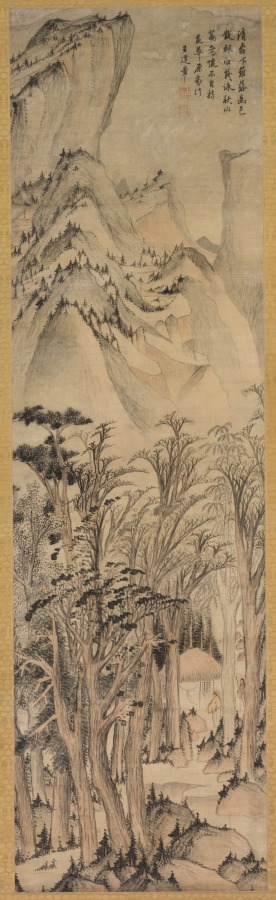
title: Solitary Colors of the Autumn Woods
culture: China, Ming dynasty (1368–1644)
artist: Wang Jianzhang (Chinese, active 1621–1662)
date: first half 1600s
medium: hanging scroll; ink and color on satin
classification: Painting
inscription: Artist's inscription, signature, and 2 seals: Cold frost falls on the fences,/ Solitary colors scatter the maples./ Reciting the chapter of "The Autumn Water,"/ I cannot still the emotion in my old heart. After the style of Fan Hua-yüan [Fan Kuan], Wang Chien-chang . [seals] Wang shih chih yin; Chien-chang. trans. LYSL/HK/WKH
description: Two gentlemen stand outside a thatched hut in a dense forest; some trees have bare branches indicating that the season is early autumn. Wang Jianzhang’s inscribed poem refers to a chapter called “Autumn Water” from Zhuangzi, a famous Daoist text written in the 3rd century BC: "Cold frost falls on the fences, / Solitary colors scatter the maples. / Reciting the chapter of “The Autumn Water,” / I cannot still the emotion in my old heart." Wang Jianzhang lived through the collapse of the Ming dynasty (1368–1644) and the rise of the Qing dynasty (1644–1911), when China was governed by the Manchus, an ethnic people from Manchuria who were traditionally viewed as “barbarians” by the Chinese. The poetic reference to Zhuangzi’s “Autumn Water” seems to discreetly convey Wang’s feelings about his country being taken over. “Autumn Water” was about learning to take steps in the foreign way, but not acquiring a foreign tongue. Perhaps Wang was lamenting his conflicted situation. For survival he had to adapt to the new political and social climate, while still trying to maintain his own identity and Chinese traditions.